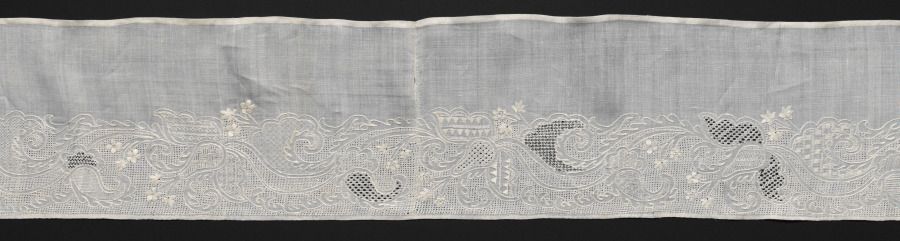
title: Embroidered Band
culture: France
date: 1800s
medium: Plain weave linen: needle lace (cutwork and drawnwork) and embroidery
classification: Embroidery